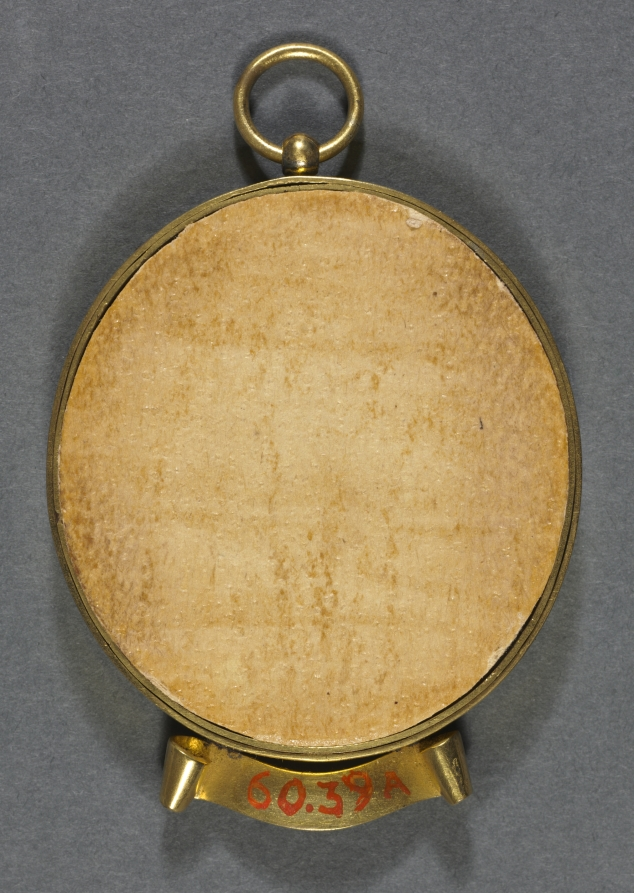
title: Portrait of Charles Howard, 2nd Baron Howard of Effingham, later 1st Earl of Nottingham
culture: England, 16th century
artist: Nicholas Hilliard (English, c. 1547–1619)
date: 1576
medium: watercolor on vellum in a gilt metal frame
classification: Portrait Miniature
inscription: inscribed from left: Ano, Dm. 1576: / AEtatis Suae; 39.